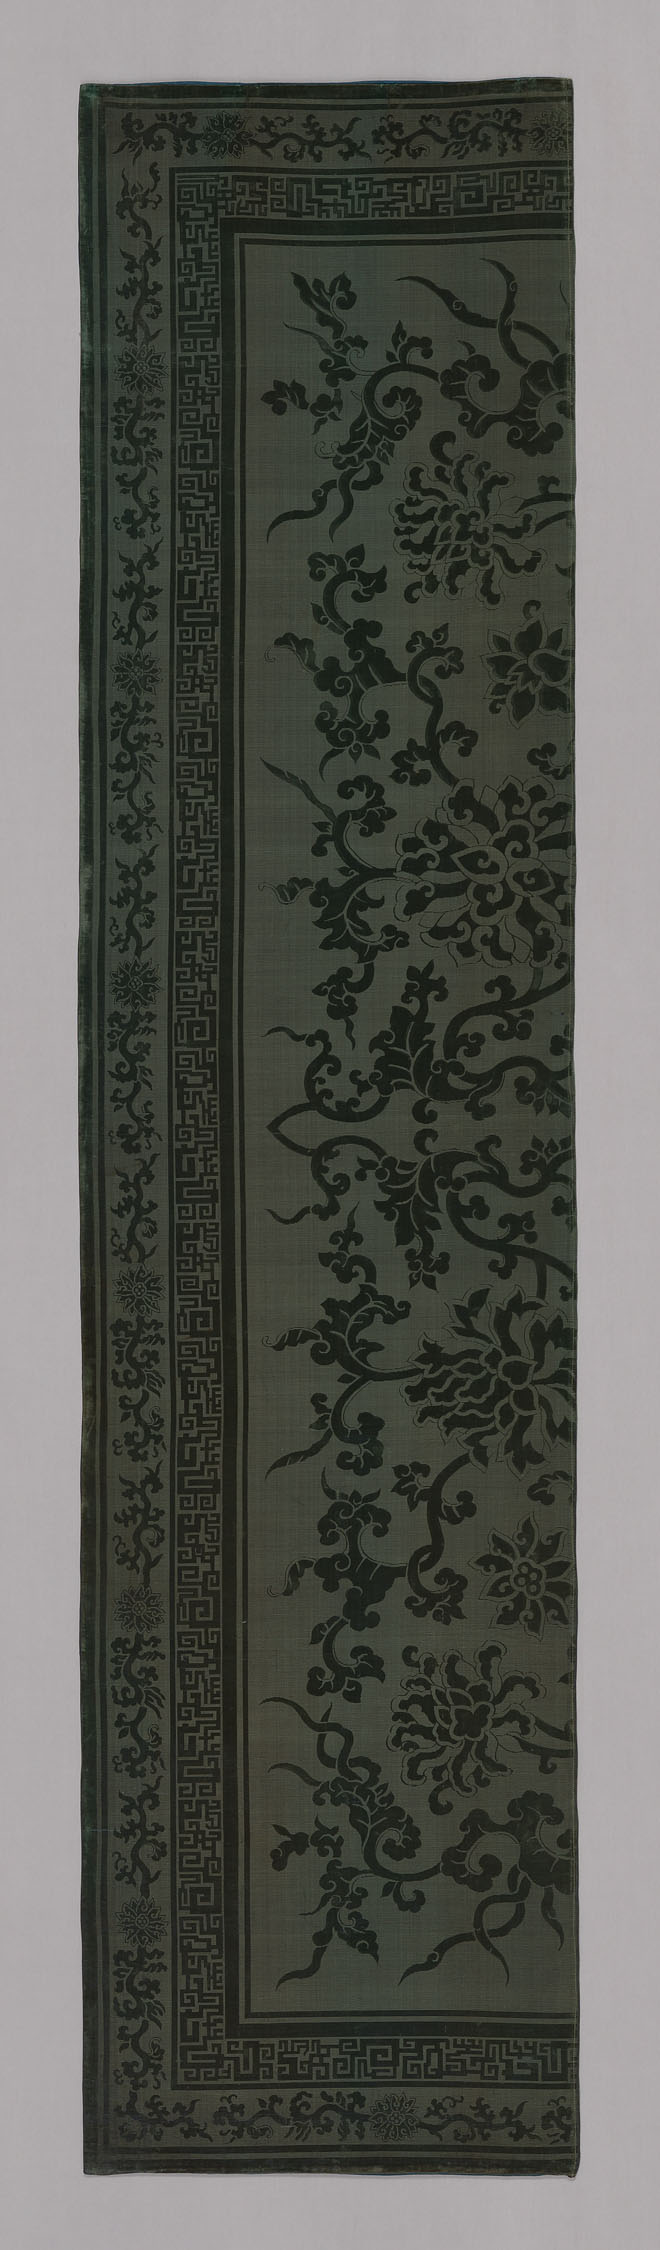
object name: Textile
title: Carpet fragment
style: qianlong, qing, Chinese (culture or style), East Asian, asian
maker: China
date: Qing dynasty (1644–1911), 1850/1900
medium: Solid cut and uncut velvet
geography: China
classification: textile; weaving - carpet; weaving